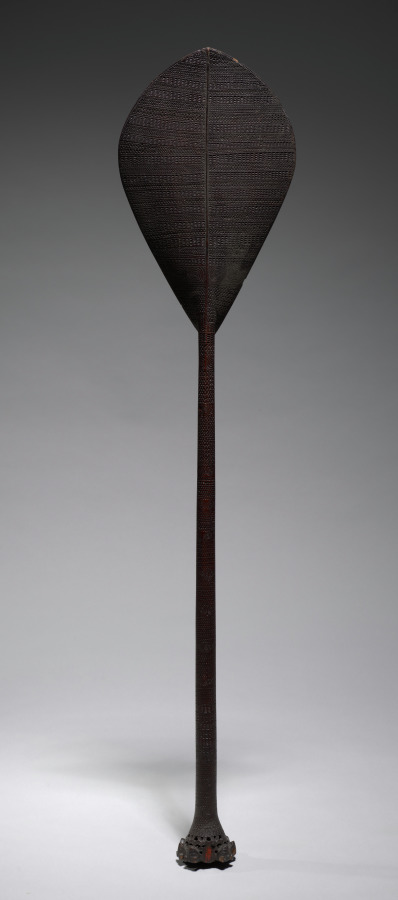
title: Ceremonial Paddle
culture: Polynesia, Ra'ivavae, Austral Islands, 18th-19th Century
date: 1700s-1800s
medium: wood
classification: Sculpture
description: Fine, chip-carved patterns cover the blades and shafts of Austral Islands ceremonial paddles. Squatting human figures carved around the butt are called tiki tiki tangata, meaning man-gods. The shafts of early paddles are usually round in cross-section; 19th-century examples are sometimes square. The function of the intricately carved Austral Islands paddles is uncertain. They may have been displayed on ceremonial occasions, such as dances, pageants, ancestral rituals, or inaugurations.